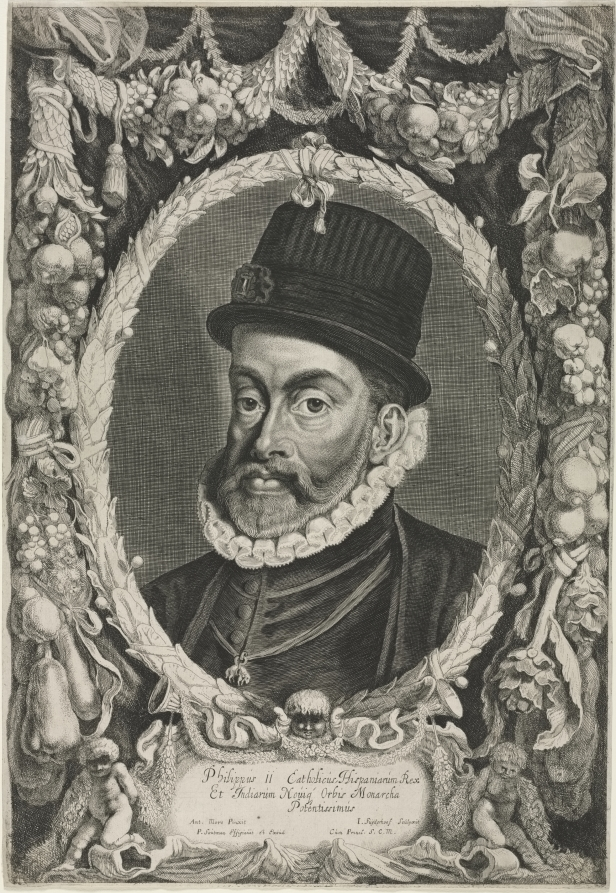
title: Portrait of Philip II, King of Spain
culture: Netherlands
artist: Jonas Suyderhoef (Dutch, c. 1613–1686)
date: 1644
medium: engraving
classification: Print